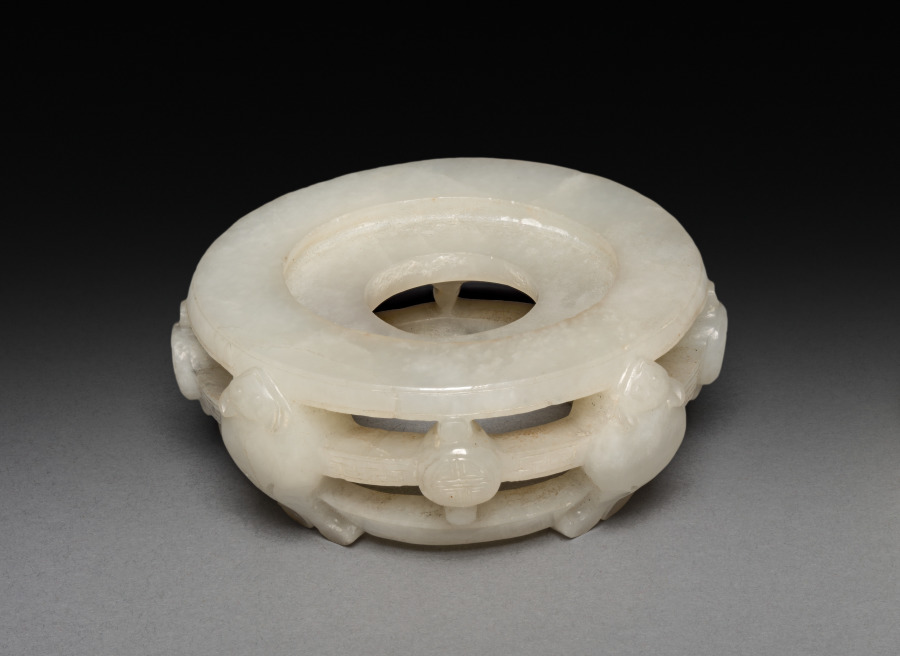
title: Three-Sectional Altar Group: Small Bowl with Carved Dragon (bottom section of base)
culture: China, Qing dynasty (1644-1911)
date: 1644–1911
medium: jade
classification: Jade